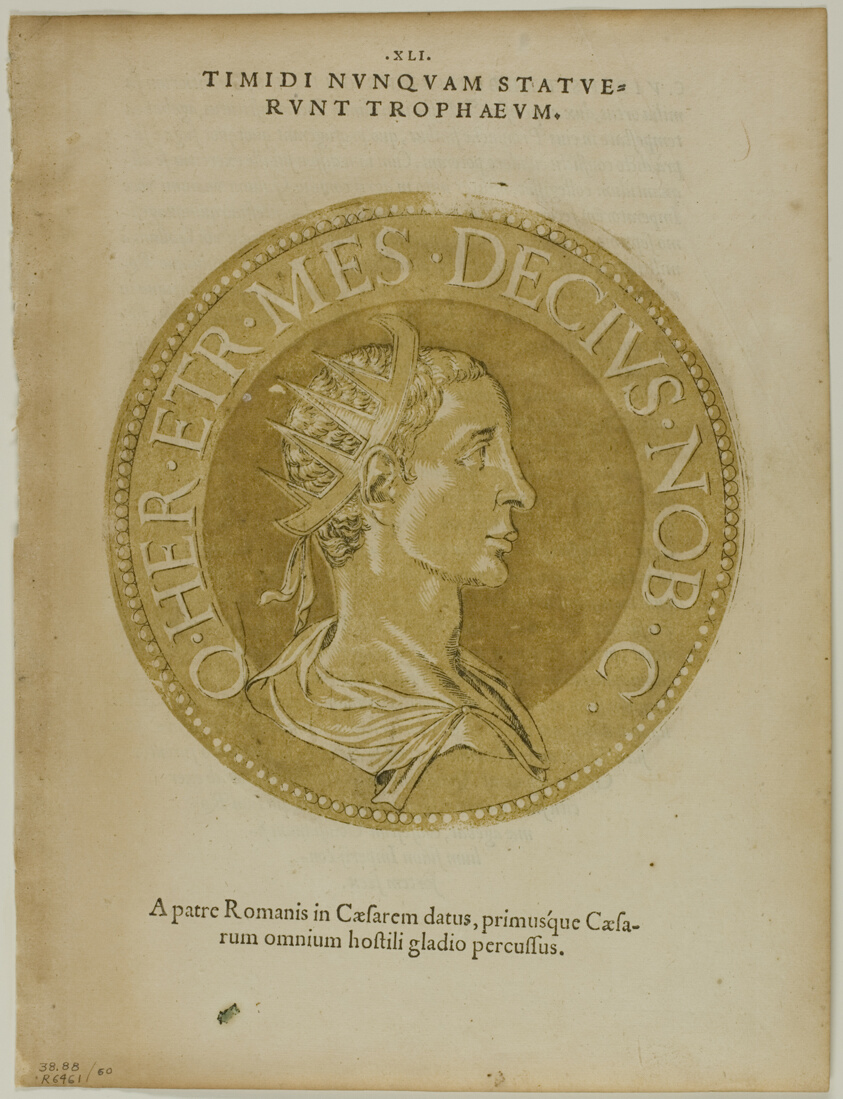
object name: Print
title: Emperor Decius from Icones Imperatorum Romanorum, plate 60 from Woodcuts from Books of the XVI Century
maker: Hubrecht Goltzius (Netherlandish, 1526-1583) and Josse van Gietleughen (Netherlandish, active c. 1545); assembled by Max Geisberg (Swiss, 1875-1943)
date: 1557, assembled into portfolio 1937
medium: Chiaroscuro etching and woodcut on paper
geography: Netherlands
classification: woodcut; print; prints and drawing